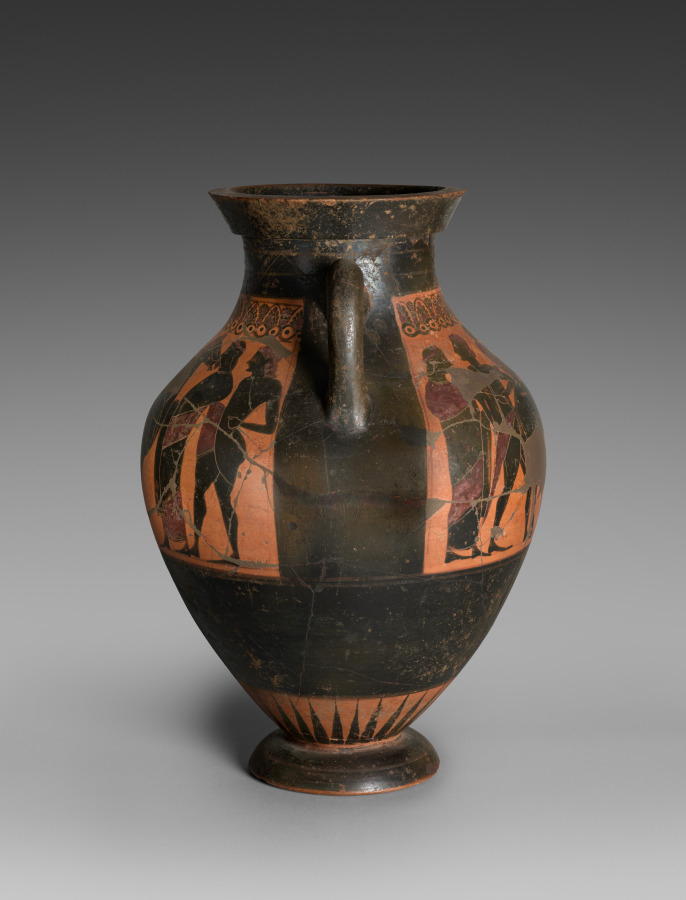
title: Black-Figure Amphora (Type B; Storage Vessel): Men and Horses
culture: Greek, Attic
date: c. 540 BCE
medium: ceramic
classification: Ceramic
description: Although pieced together from many fragments (with some still missing), this sizeable amphora remains impressive. On each side, a horsemen and four figures are contained within a large, reserved panel beneath a lotus-palmette frieze. The scenes, which differ slightly from one another in various details, cannot be identified with known historical or mythological figures or episodes.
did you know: The two sides of this amphora are very similar—a horseman flanked by pairs.